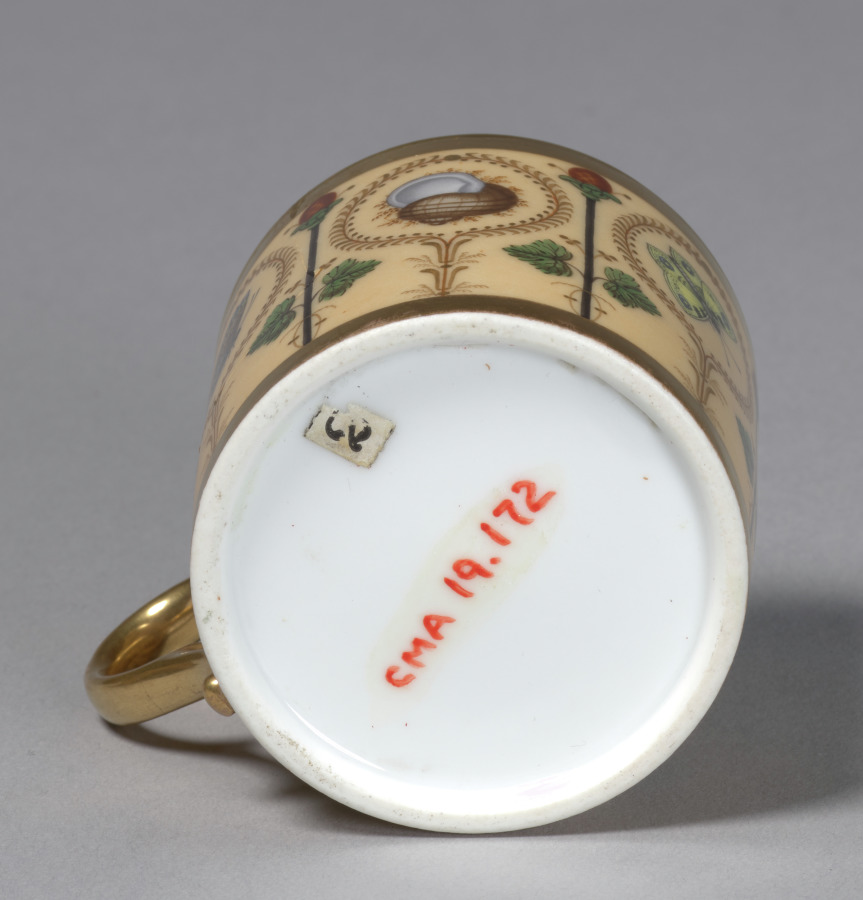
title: Cup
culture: France, 19th century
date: c. 1800–1810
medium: porcelain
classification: Ceramic